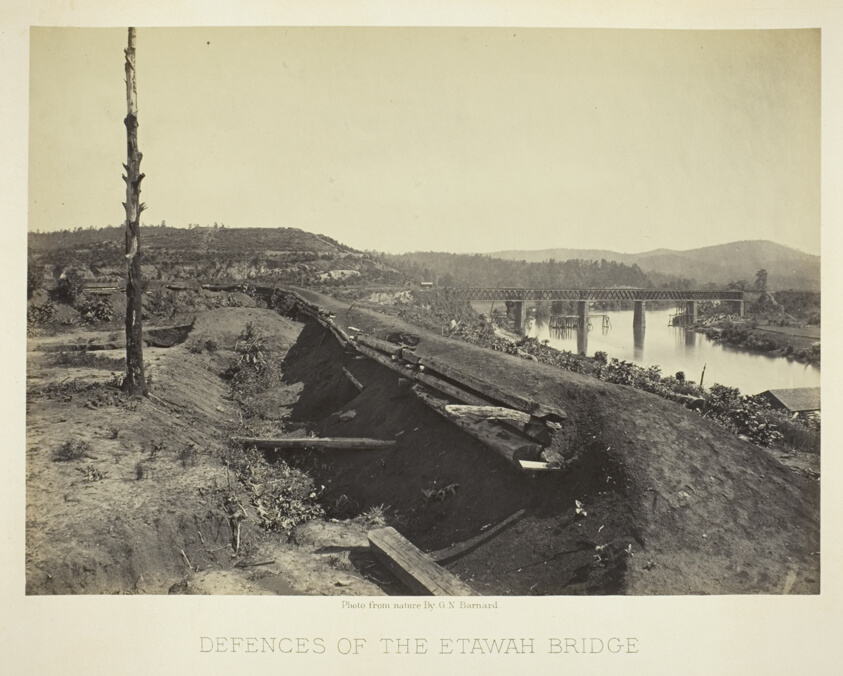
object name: Photograph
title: Defences of the Etawah Bridge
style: 19th century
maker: George N. Barnard (American, 1819–1902)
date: 1866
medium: Albumen print, plate 23 from the album "Photographic Views of the Sherman Campaign" (1866)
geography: United States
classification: albumen silver print; photographic process; photography; photograph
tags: Collected by Hugh Edwards, Sherman's Campaign 1866